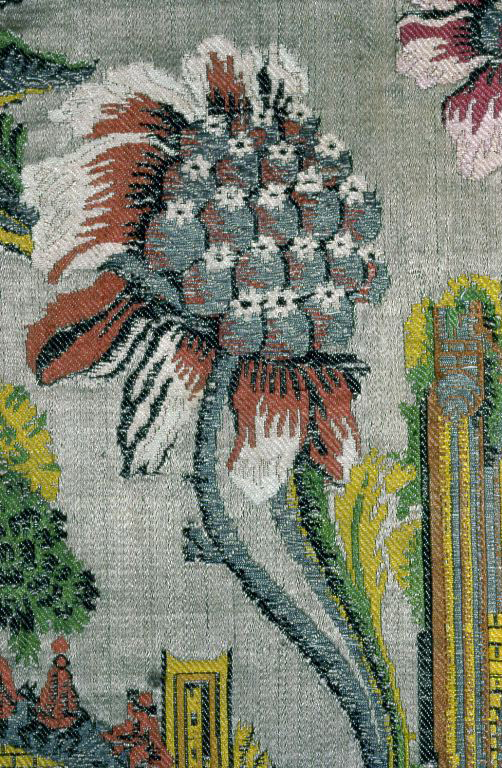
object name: Textile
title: Panel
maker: Possibly France or Netherlands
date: c. 1735/36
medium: Silk and gilt-metal-strip-wrapped silk, warp-float faced 7:1 satin weave with secondary binding warps, supplementary brocading wefts, and self-patterned by areas of twill interlacing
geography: France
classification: textile; weaving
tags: Floating Gardens